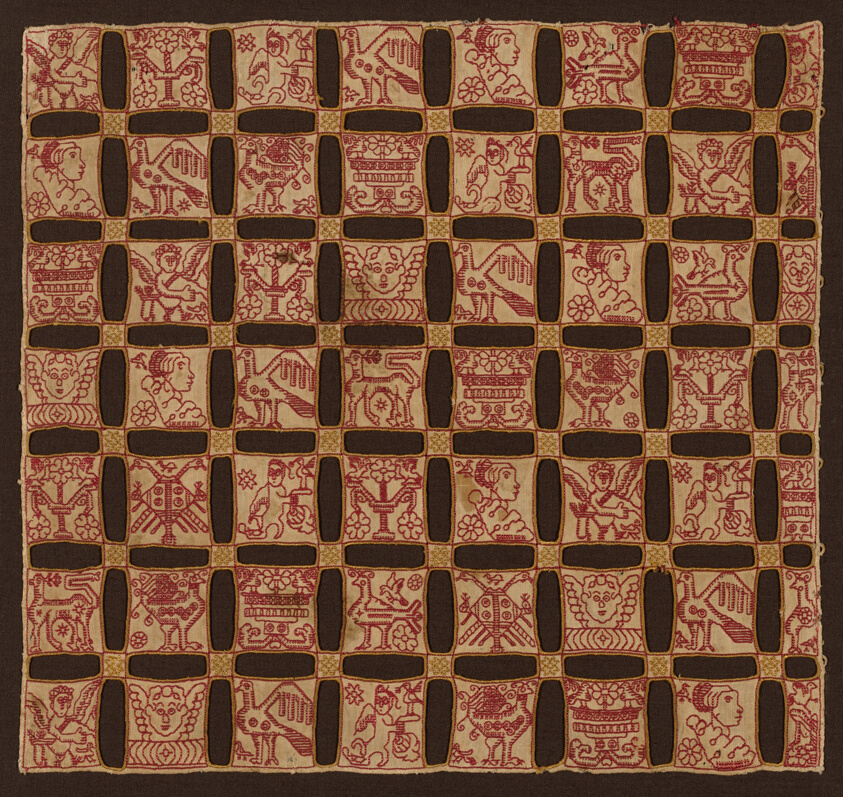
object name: Textile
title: Panel (Probably used as a Pillow Cover)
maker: Italy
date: c. 1600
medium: Linen, plain weave; cutwork; embroidered with silk floss in double running and wrapping stitches; linen picot loops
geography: Italy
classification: textile; needlework (visual works)